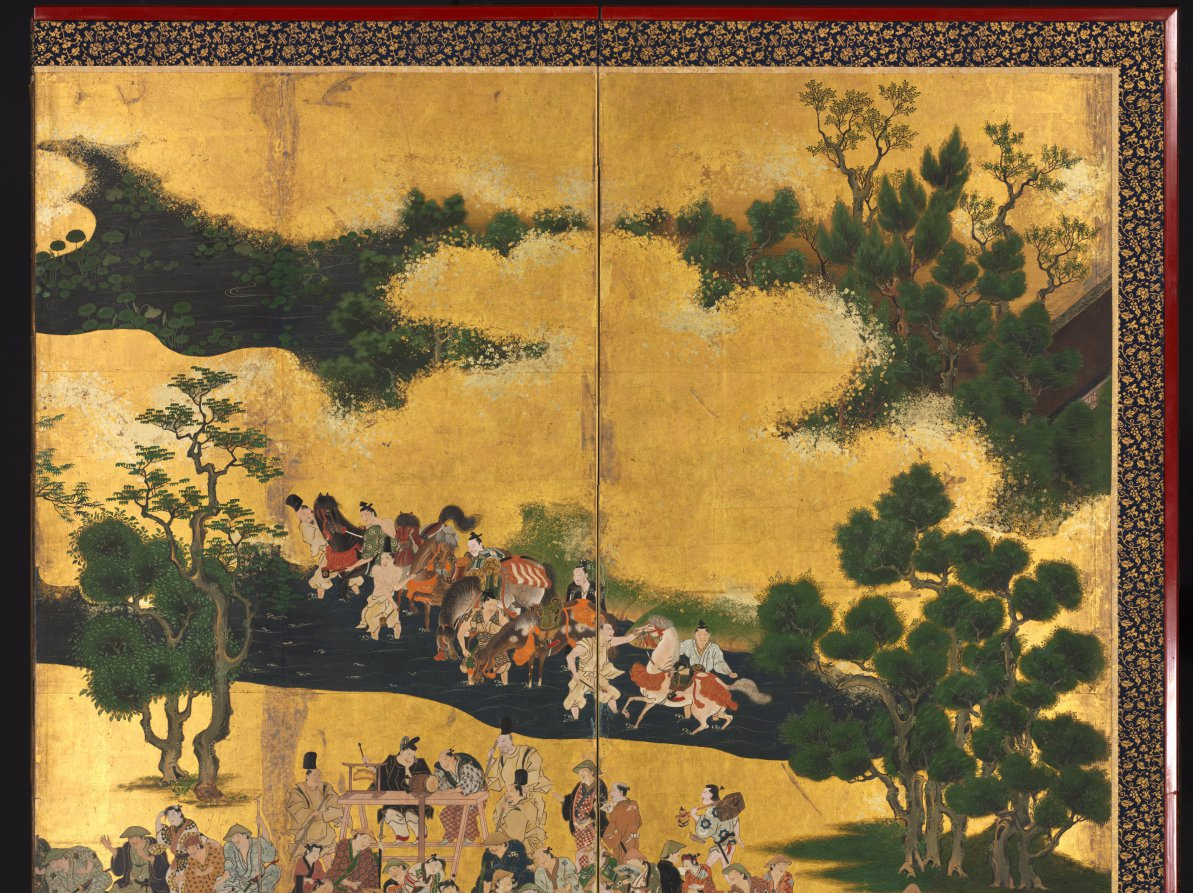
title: Horse Race at the Kamo Shrine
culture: Japan, Edo period (1615–1868)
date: early to mid-1600s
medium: One of a pair of six-panel folding screens; ink and color on gilded paper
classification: Painting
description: Kamo Shrine in Kyoto, seen in the upper half of the left screen, has held an annual horse race on May 5th since the ninth century. Serving as a snapshot of the festivities, this pair of screens captures nearly 600 people watching the race, beginning at the bottom part of the right screen and continuing to the left. The race is a great spectacle where aristocratic riders cling to their fast and unwieldy mounts. While many of those in attendance seem in rapt attention to the main event, other vignettes depict people engaged in an array of activities. This pair of screens was likely originally part of a group of linked murals.